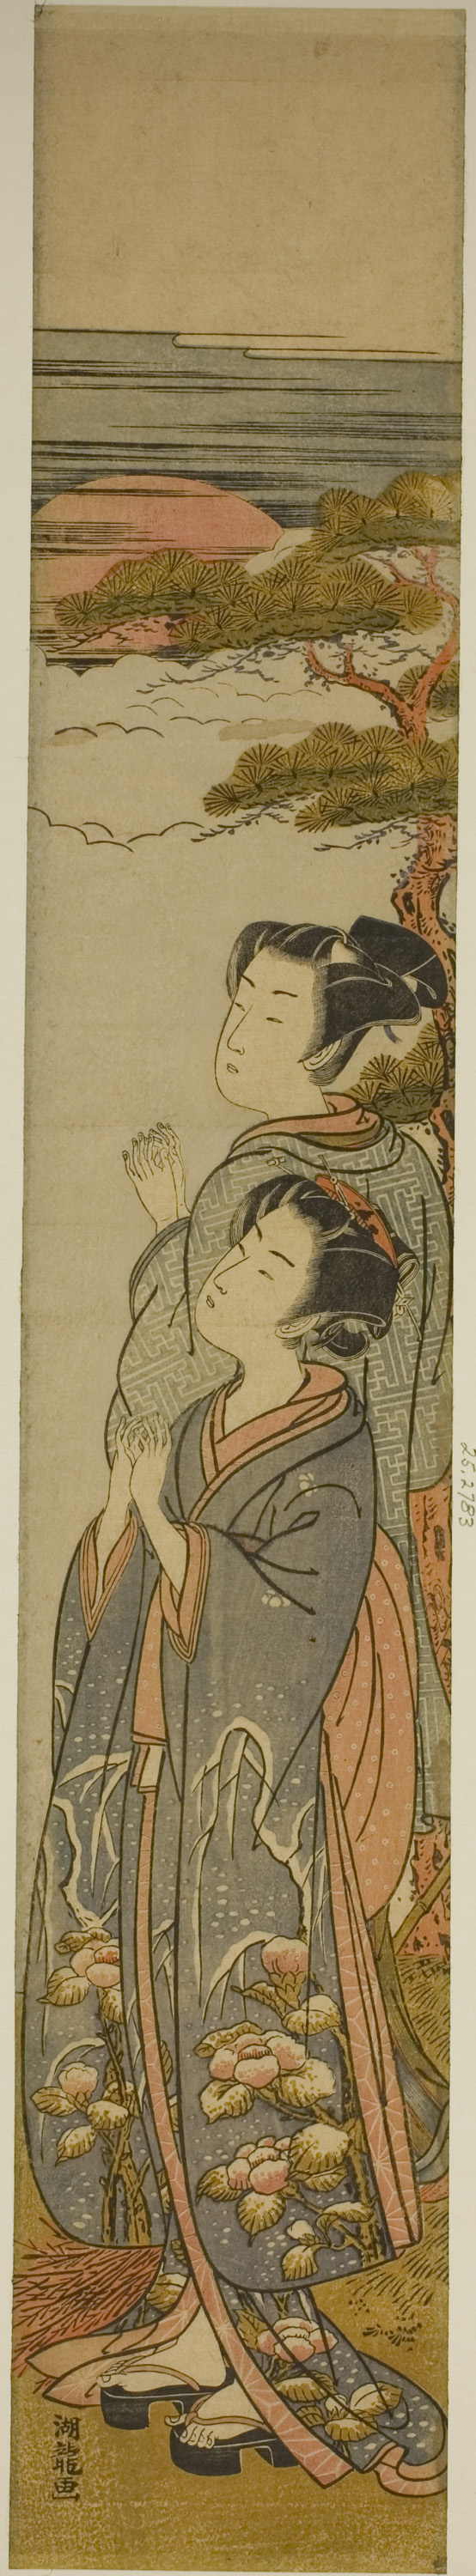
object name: Print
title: Greeting the Rising Sun on New Year's Day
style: Japanese (culture or style)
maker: Isoda Koryusai (Japanese, 1735-1790)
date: c. 1774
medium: Color woodblock print; hashira-e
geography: Japan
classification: woodblock print; print; asian art